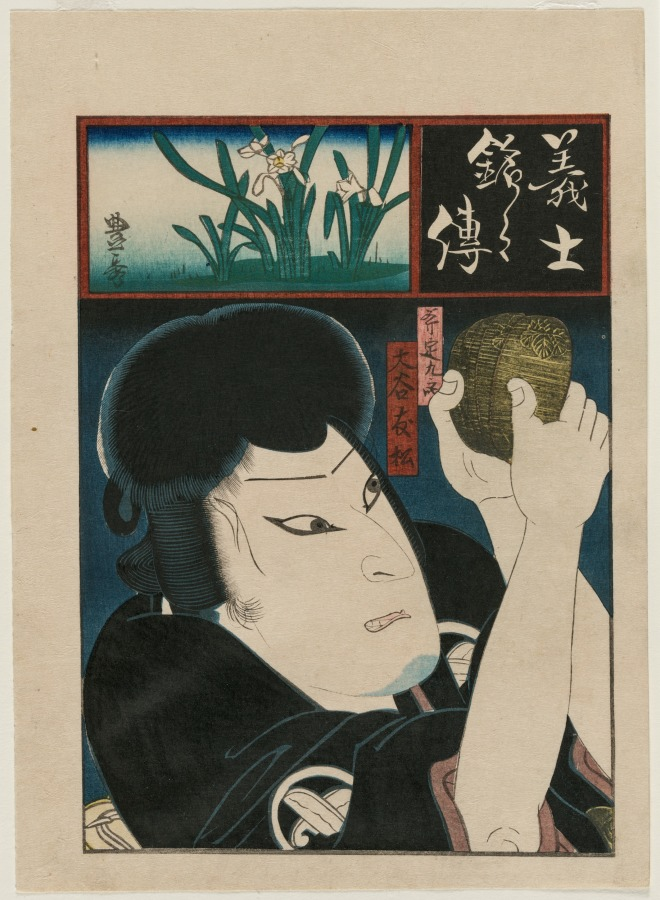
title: Otani Tomomatsu as Ono no Sadakuro Counting the Stolen Gold Coins (from the series Biographies of the Famous and Loyal Retainers)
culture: Japan, Edo period (1615–1868)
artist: Kitagawa Toyohide (Japanese)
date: 1860s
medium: color woodblock print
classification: Print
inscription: Signature: Toyohide